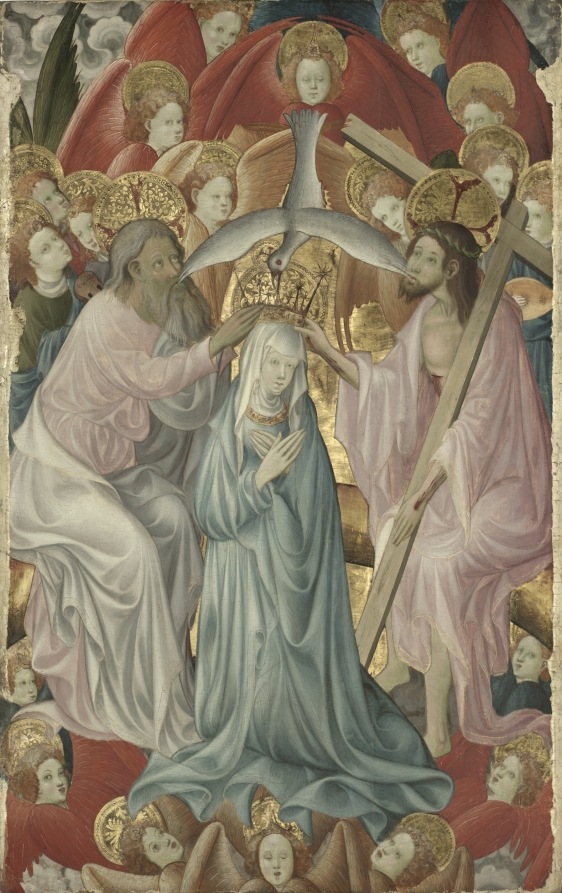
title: The Coronation of the Virgin with the Trinity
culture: Spain, Valencia, early 15th Century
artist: Master of Rubielos de Mora (Spanish)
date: c. 1400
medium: oil on panel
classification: Painting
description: The Coronation of the Virgin celebrates the culminating scene in the narrative cycle of the life of the Virgin. The subject follows Mary’s ascent into heaven after her death. Surrounded by a choir of music-making angels, the Virgin kneels to accept her crown from God and Christ. Completing the Trinity is the dove of the Holy Ghost touching its wings to their mouths. In this event, Mary takes on the role of the personification of the Church itself in her depiction as Regina Coeli or Queen of Heaven. The painter takes his name from an altarpiece in the church at Rubielos-de-Mora, Spain, though little is known about him. His style, featuring piercing eyes and protruding mouths with long slender fingers, is characteristic of Valencian art around 1400.